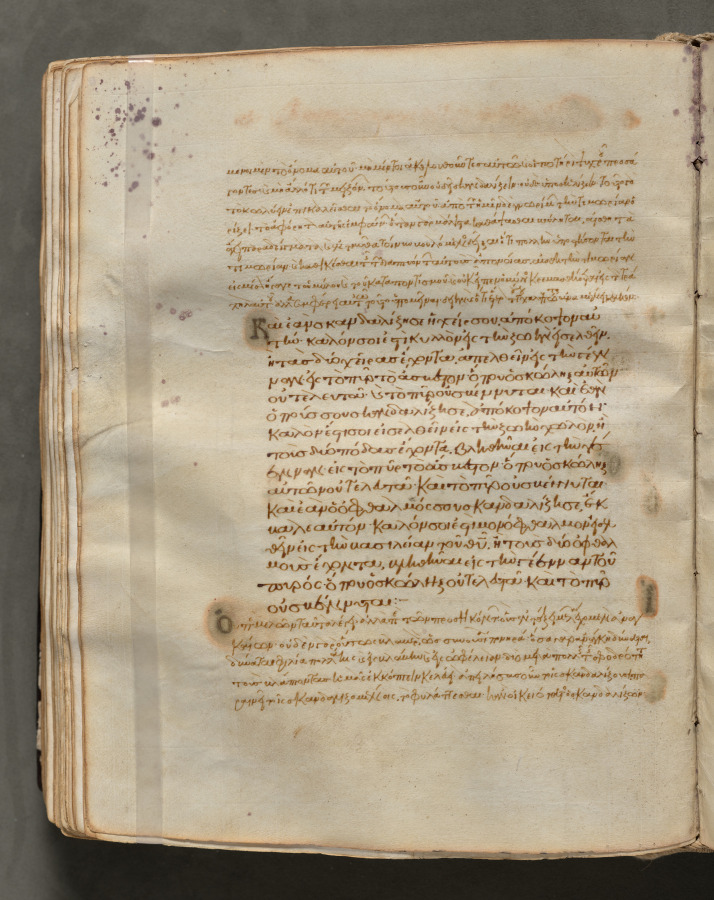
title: Text, folio 166 (verso), from a Gospel Book with Commentaries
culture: Byzantium, Constantinople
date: c. 1000–1100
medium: ink, tempera, and gold on vellum; leather binding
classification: Bound Volume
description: Each of the four gospels in this book opens on a page with brilliantly illuminated borders depicting the author of the text as well as birds-principally peacocks, symbols of the immortality of the soul-and fountains, representing the fountain of life and the salvation of the soul. This volume consists of 428 leaves with texts in Greek. Its level of sophistication suggests that it was probably written and decorated in a monastery in Constantinople.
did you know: Gospel Books were carried in procession through Byzantine churches.